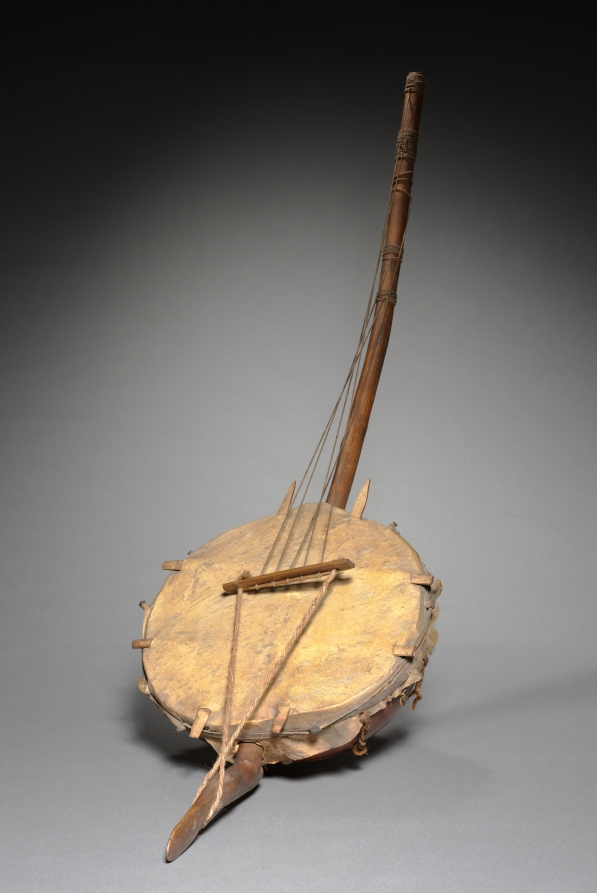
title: Kora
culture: Africa, unknown maker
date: before 1918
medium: Gourd, wood, rawhide, string, and rope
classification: Musical Instrument